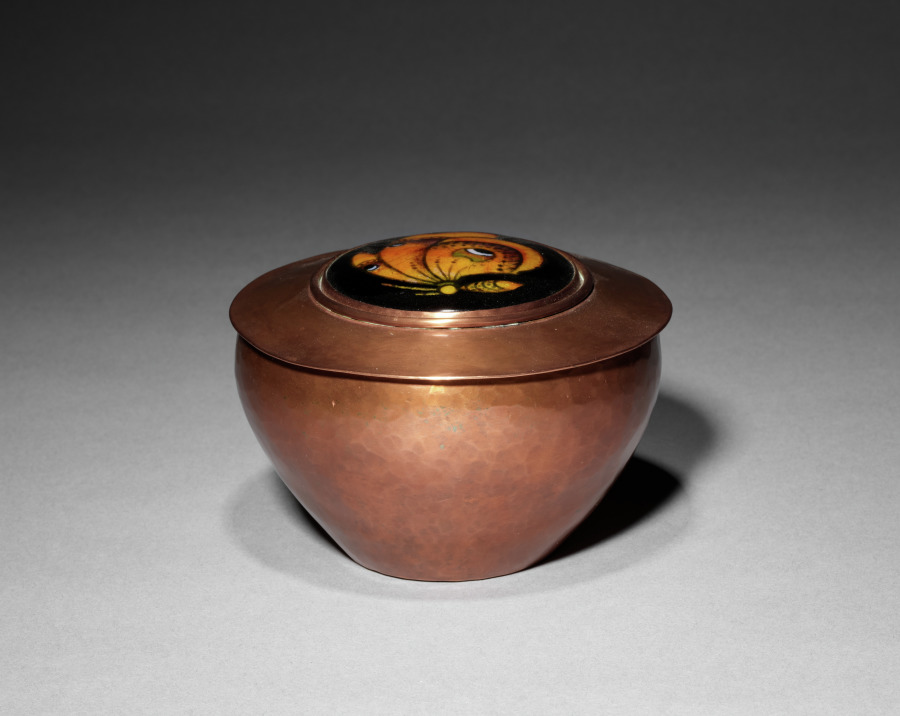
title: Covered Bowl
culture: America, Ohio, Cleveland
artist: Kenneth F. Bates (American, Cleveland, 1904–1994)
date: 1927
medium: copper and enamel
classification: Enamel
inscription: incised on bottom: "Kenneth F. Bates 1927."